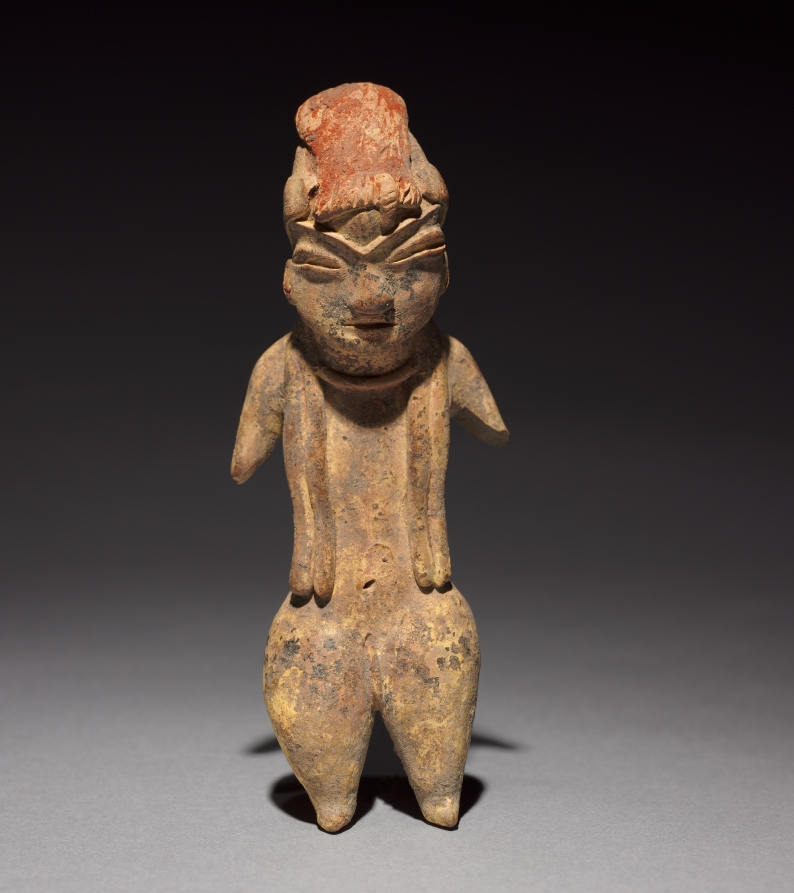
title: Female Figurine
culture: Mesoamerica, Central Mexico, Tlatilco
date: c. 1200–900 BCE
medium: earthenware with pigment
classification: Sculpture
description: This ceramic figurine—in the style of Tlatilco, an early village site near Mexico City—depicts a nude female with an elaborate coiffure, attenuated arms, and the traces of mineral pigment. Since many figurines from the period depict females, modern interpreters usually connect them to fertility concerns. At Tlatilco, figurines were found in human burials that had been placed under the floors of homes.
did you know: Figurines were also made of perishable materials including wood, paper, cloth, rubber, and dough.